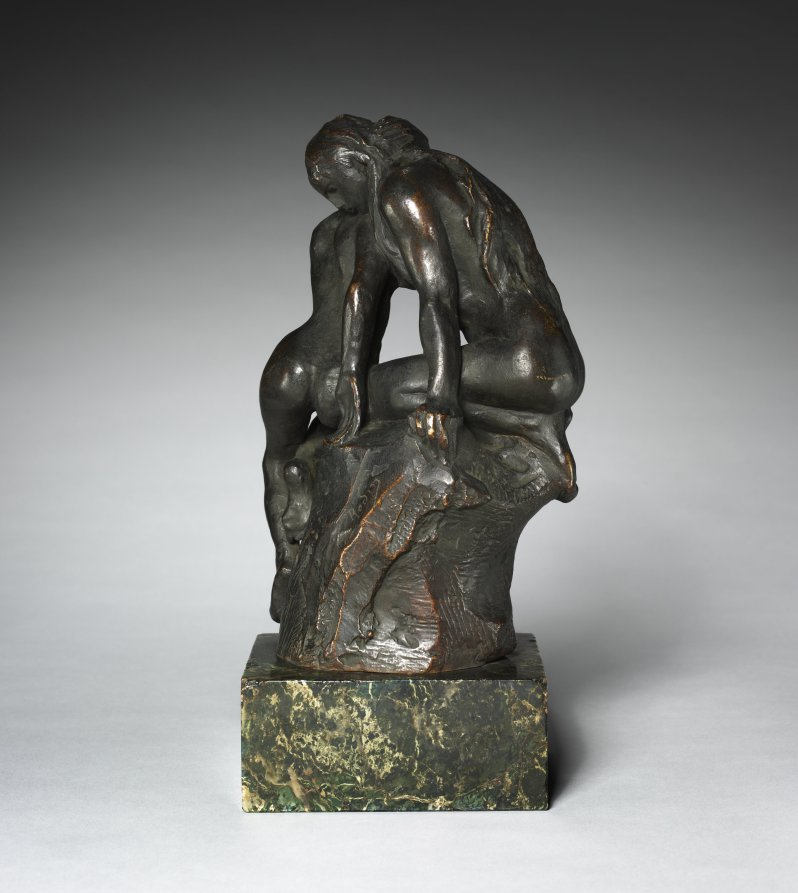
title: Young Girl Confiding Her Secret to Isis (Jeune fille confiant son secret à Isis)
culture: France, 19th century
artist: Auguste Rodin (French, 1840–1917)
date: 1899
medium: bronze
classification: Sculpture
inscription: Inscribed in area below larger figure's left hand and smaller figure's right hand: "Rodin"; below feet of larger figure: "L. Persinka, Fondeur, Versailles"